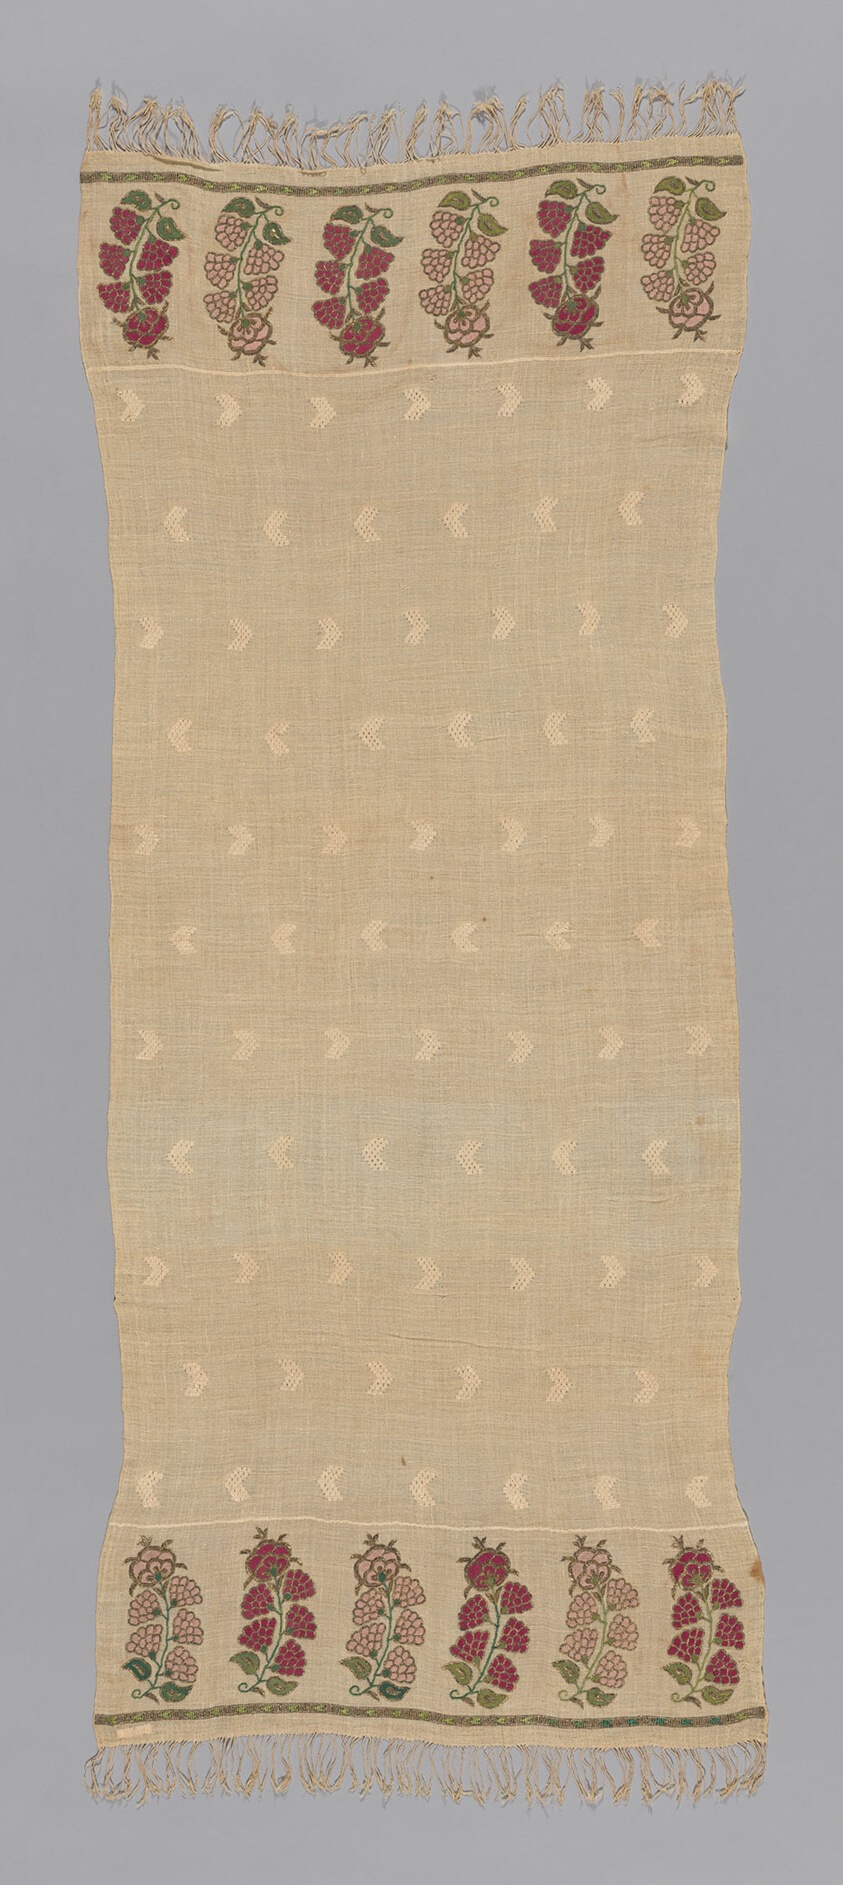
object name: Textile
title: Towel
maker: Turkey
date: 19th century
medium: Embroidered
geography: Turkey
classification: textile; needlework (visual works); weaving